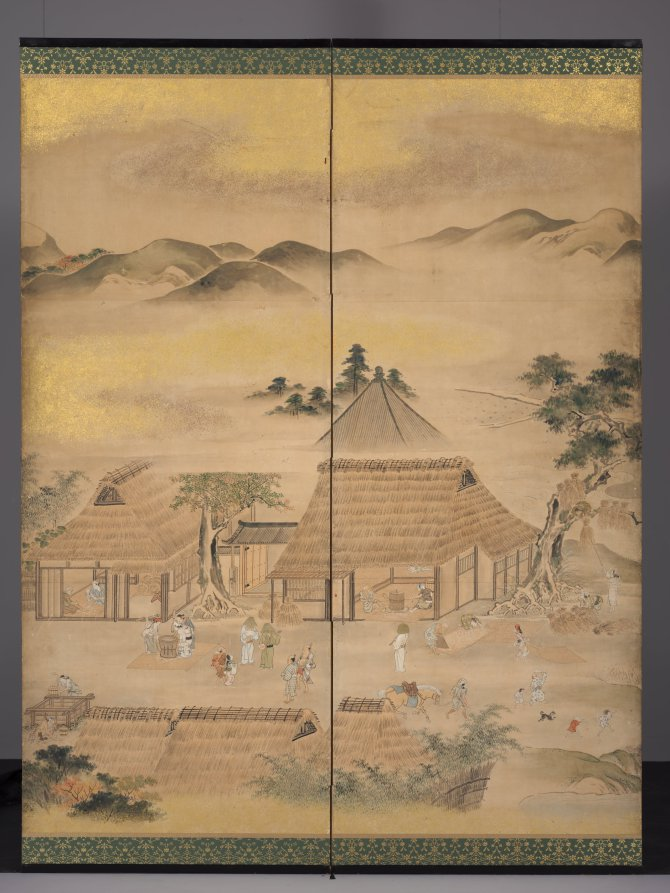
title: Spring and Autumn Farming (Autumn)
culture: Japan, Edo period (1615–1868)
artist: Kō Sūkoku (Japanese, 1730–1804)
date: 1700s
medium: Six-panel folding screen, ink, light color, gold, and silver on paper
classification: Painting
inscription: Signature of the artist: "Enrin san jin Rakushisai ko Sukoku ga" (each screen)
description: These screens present the cycle of the farming year, starting with spring at right and ending with fall at left. Close examination of these screens reveals moments of games and amusement, the enjoyment of meals as well as intellectual and spiritual pursuits interspersed among the scenes of cultivating and preparing the rice harvest. The artist Kō Sūkoku is considered the 18th-century heir in style and attitude to Hanabusa Itchō (1652–1724). Itchō’s work incorporated elements from Kano school, ukiyo-e, and literati styles of painting. Kō trained with one of Hanabusa’s pupils, Sawaki Sūshi, who was best known for scenes depicting everyday life and customs.